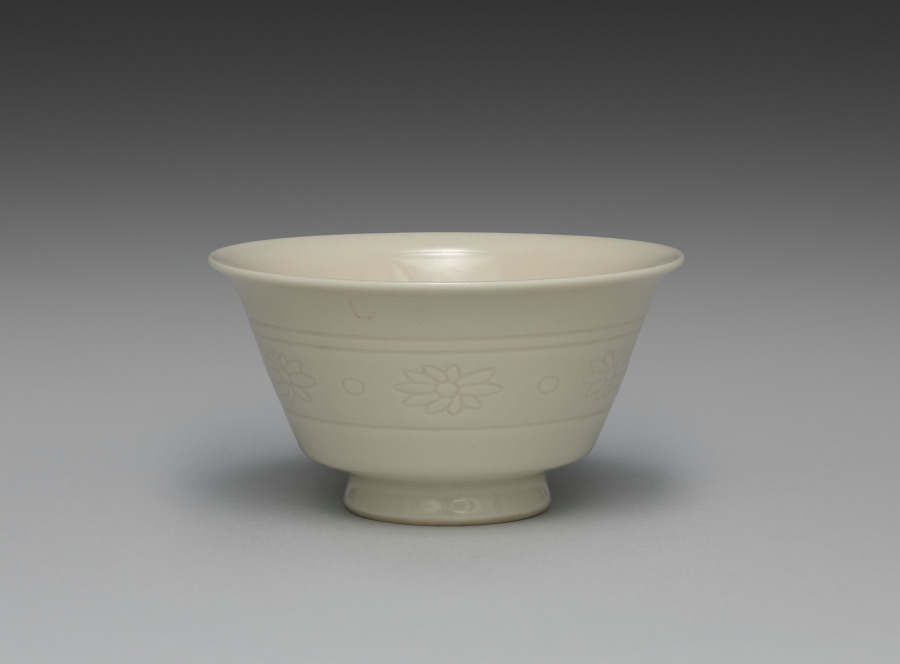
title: Teacup from Teacups with Floral Band Motif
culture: Japan, Meiji period (1868–1912)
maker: Seifū Yohei III (Japanese, 1851–1914)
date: 1893–1914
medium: One from a set of five cups; porcelain with incised decoration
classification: Ceramic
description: The five sencha teacups in this set are decorated with incised flowers and dots between a double band at the top and a single band at the bottom. They are in Yohei III’s creamy taihakuji body and glaze. In their motifs, they are quite similar to an incense burner by Yohei III (see CMA 2022.180), but the flowers are even more simple in design, with no open circle at the center. A label affixed to the side of the box refers to them as “sencha cups in emulation of Korean white [ware].” The reference to Korean ware indicates that even though Yohei was more directly inspired by Qing-dynasty wares from the Dehua kilns in Fujian Province in developing his porcelain clay and glaze for works such as these, the general understanding of the continental models still placed them, at least in terms of color, among pieces broadly associated in Japan with Korean white wares. The delicate cups are thinly potted, so they have a highly desirable translucency.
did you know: The delicate cups in this set are thinly potted, so they have a highly desirable translucency.